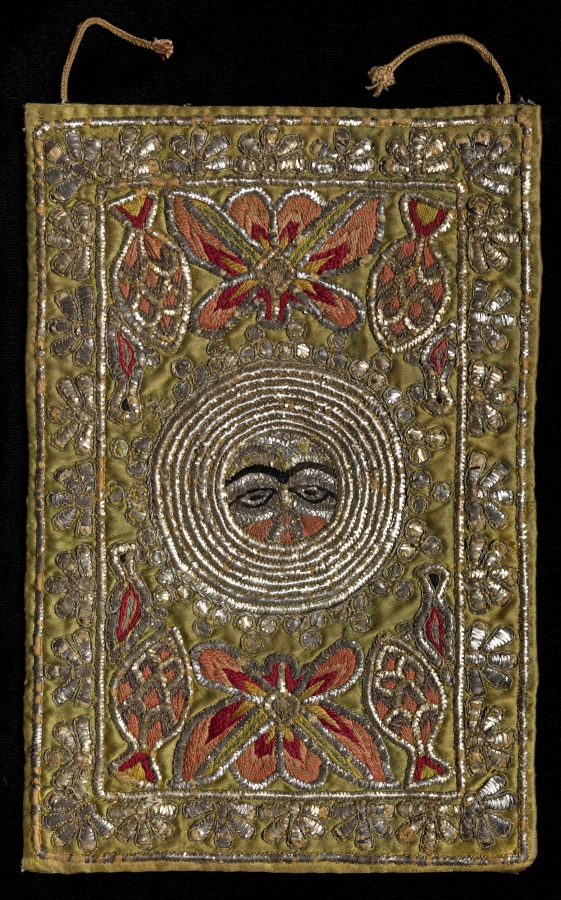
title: Embroidered Textile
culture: India, Rajasthan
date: late 1800s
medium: Silk, gold and silver thread on satin; embroidery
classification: Embroidery